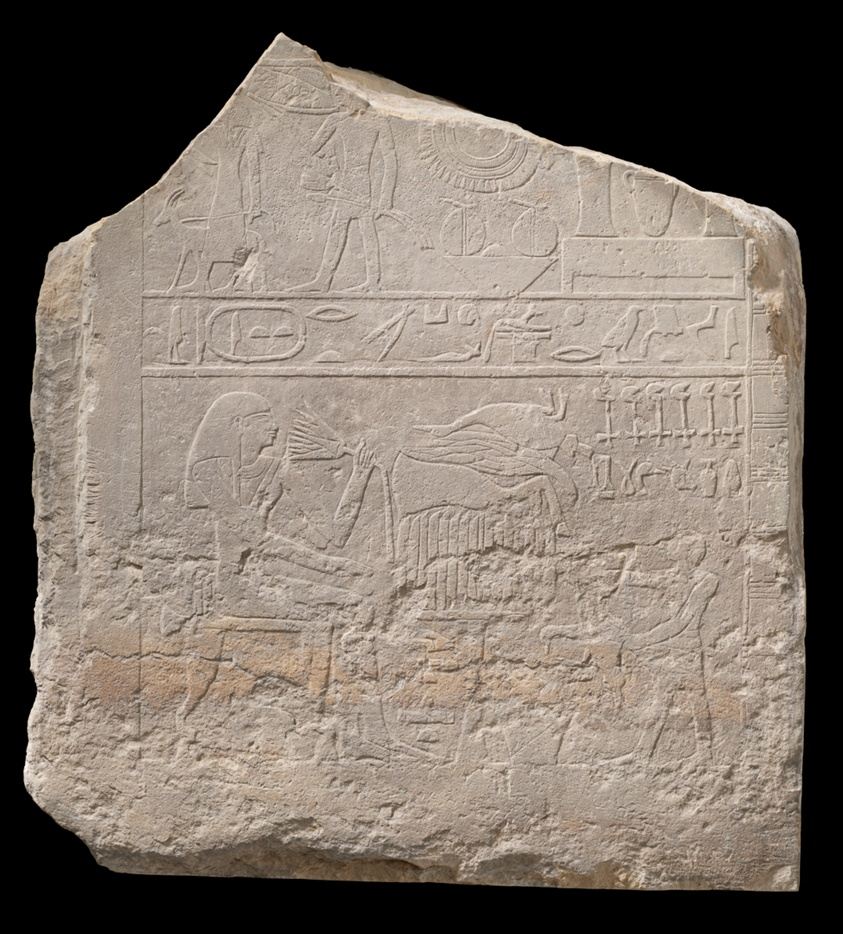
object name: Architectural fragment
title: Relief Fragment Depicting Merettetiiyet with Offerings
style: first intermediate period, egyptian, ancient, tenth dynasty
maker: Egyptian; offering niche of Merettetiiyet, Teti Pyramid Cemetery, Saqqara, Egypt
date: First Intermediate Period, Dynasty 10, about 2050 BCE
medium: Limestone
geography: Saqqara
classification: architectural fragment; stone; sculpture; ancient art; Stelae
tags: funerary art, cartouches, flowers, food, Hieroglyphs, jewelry, offering, women